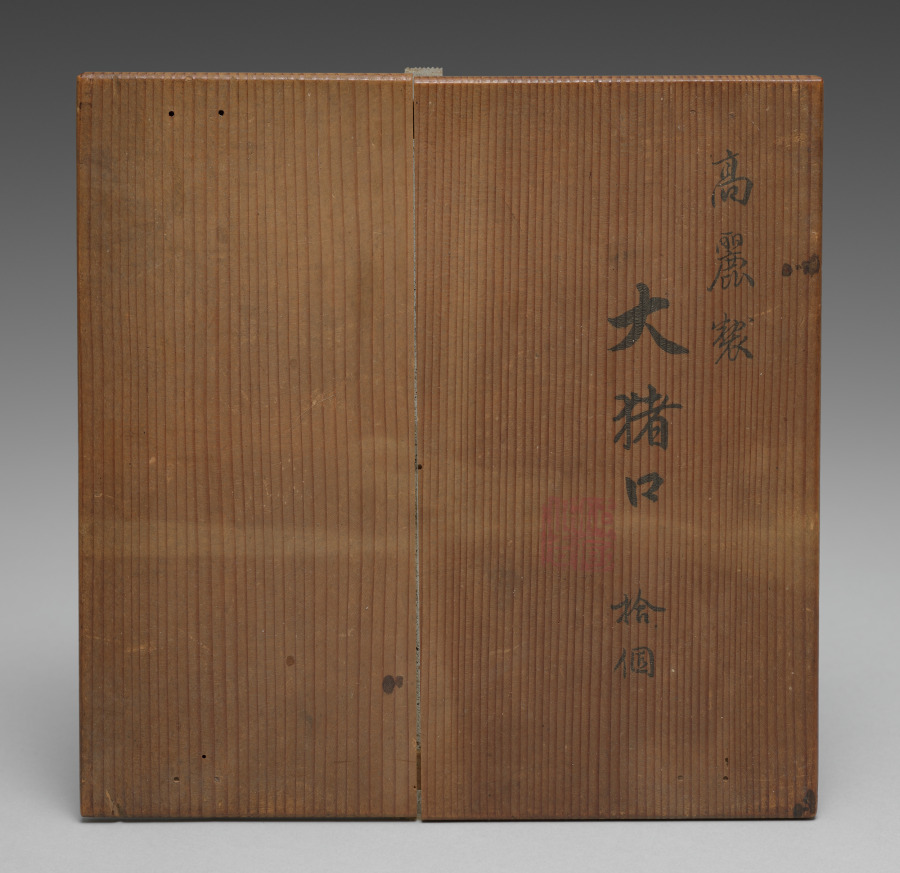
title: Dining Set with Plum Blossoms and Cracked-Ice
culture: Japan, Edo period (1615–1868) to Meiji period (1868–1912)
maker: Seifū Yohei II (Japanese, 1844–1878)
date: 1875–78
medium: Porcelain with molded designs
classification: Ceramic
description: Each item in this set has a delicate low-relief design of flowering plum branches over scattered, intersecting lines meant to resemble the cracked-ice surface of a frozen body of water and is signed on the base in gold pigment. While Yohei II produced many fine works in underglaze blue, like those produced by Kiyomizu Shichibei, he also made works in quite different styles later in his career, from the early 1870 s. In 1873, he was appointed purveyor to the Industrial Center of Kyoto Prefecture, a designation associated with Kyoto’s efforts to reach an international market through the port of Kobe; and from 1875 until his death, he was involved in national-level projects to present Japanese ceramics across the world. It was during this period that Yohei III was apprenticed to Yohei II, and it has been suggested that this set may in fact be an early example of Yohei III’s work, which he signed with his teacher’s name. Decorated with flowers resembling Japanese textile motifs, the set calls to mind the design of Yohei II’s pair of vases with plum blossoms in the Victoria and Albert Museum. Here, the elaborate trees created for a formal public exhibition setting have been translated into the approachable blossoms of the genteel domestic environment. While the designs are consistent across the pieces, each raised flower petal and pistil and each incised line in the ice was done by hand, so the cups, bowls, and dishes are similar yet unique. The bottoms of two boxes once identified the set’s owner, but the information has been deliberately obscured with black ink. However, inscriptions still visible appear to indicate two occasions, once at the end of July 1886 , and once again in June 1916 , when parts of the set were requested from Hokura in Niigata Prefecture. The location corresponds to a neighborhood in the present-day city of Jōetsu. The surname Tsuji 辻 also appears on a paper tag affixed to one of the box cloths. Future research may possibly reveal more about their provenance. A vase by Yohei III in a private collection combines the formal grandeur of the Yohei II vases in the Victoria and Albert Museum with the gentler design of this dining set, placing flowering plum trees against soft, scalloped-edge clouds resembling those in golden screens.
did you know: The dining wares have a creamy white coloration that the four boxes containing them identify as Korean in style.